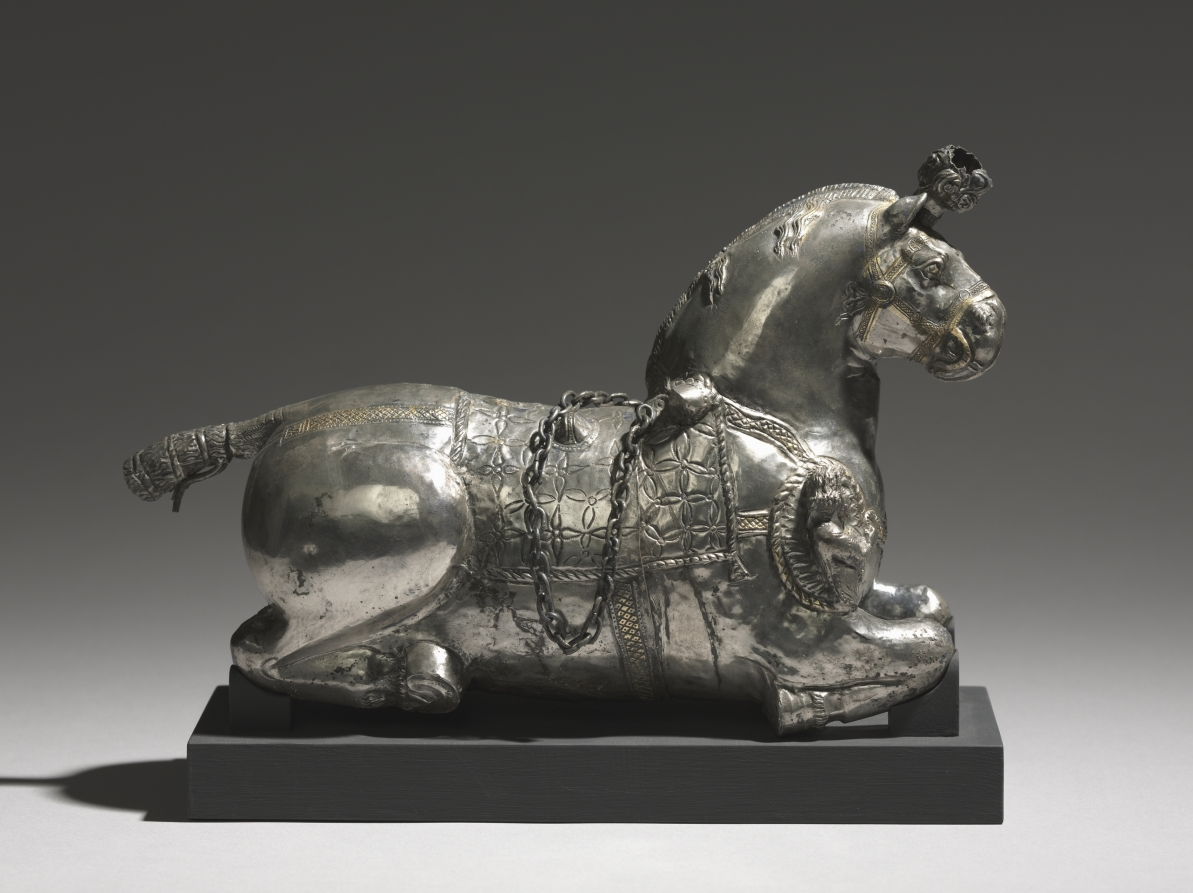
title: Horse-Shaped Drinking Vessel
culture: Iran, Sasanian Empire (224–651 CE)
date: 200–325 CE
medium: silver, partially gilt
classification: Metalwork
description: The horse was a favorite artistic subject in ancient Iran, where horse breeding flourished. This muscular Sasanian stallion was descended from the royal and sacred Nisean breed of the Achaemenian Persians. Although Sasanian horse trappings were elaborate, they did not include stirrups for mounting. In this rendition, the steed lies still, as camels in the Near East do today, waiting for its rider to mount. The medallions on each shoulder contain busts, perhaps of rulers of different parts of the Sasanian Empire, holding their rings of authority.